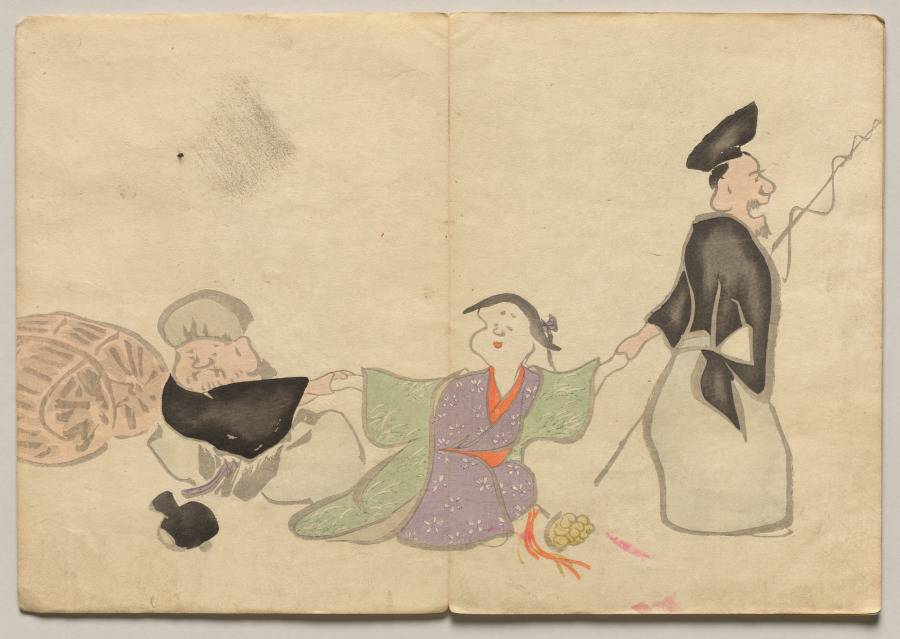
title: Scene from The Kōrin Picture Book (Volume 1)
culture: Japan, Edo period (1615–1868)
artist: Nakamura Hōchū (Japanese, d. 1819)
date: 1800s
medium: color woodblock printed book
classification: Bound Volume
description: Ogata Korin (1658-1716) was one of the most admired artists of Rimpa, or "decorative school painting." These books by the charming later-generation Rimpa artist Hochu record Korin's inventive designs.